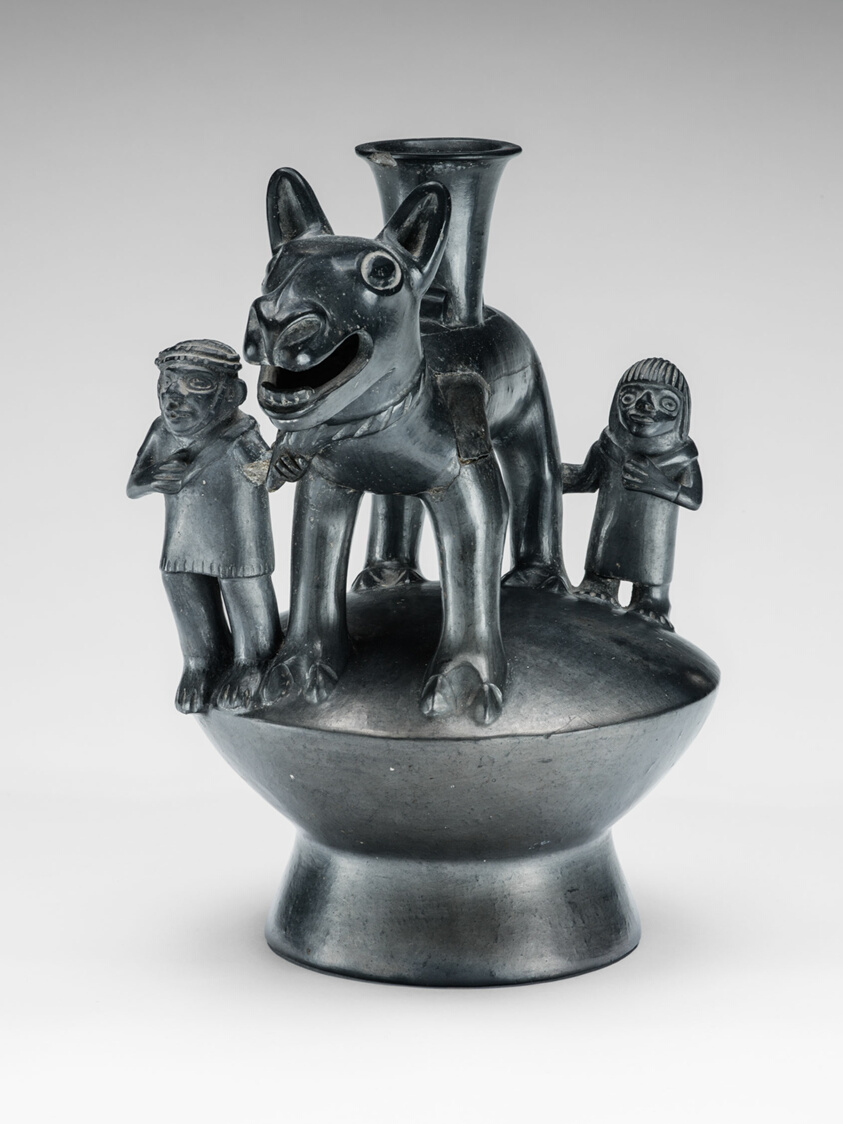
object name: Vessel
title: Vessel in the Form of a Llama and Attendant Figures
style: chimú, late intermediate period, Pre-Columbian, americas, inca, andes, Arts of the Americas, andean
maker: Chimú-Inca (North coast, Peru)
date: 1200–1450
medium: Ceramic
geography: Peruvian North Coast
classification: blackware (black basaltes); earthenware; ceramics; vessel; art of the americas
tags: people, animals, procession, ritual, llama